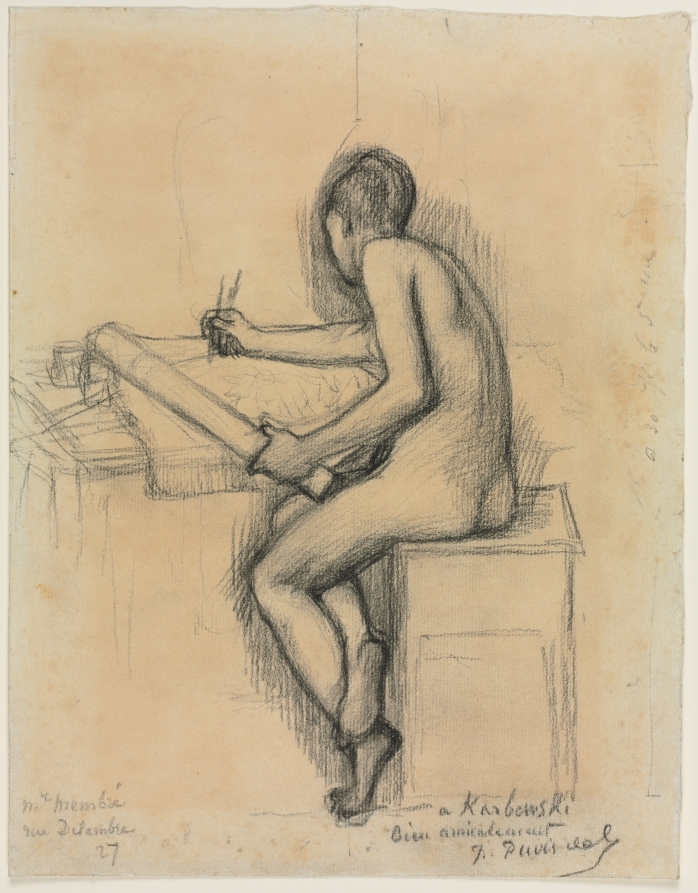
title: Study of a Seated Nude Female Model Drawing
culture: France, 19th century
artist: Pierre Puvis de Chavannes (French, 1824–1898)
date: c. 1888–1898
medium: black chalk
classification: Drawing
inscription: Inscribed lower right corner in black chalk: à Karbowski/Bien amicalement/ P. Puvis de C Inscribed lower left corner in black chalk: M[?] Membré / rue Delambre / 27 Inscription on right margin in graphite: [partially illegible] ... 30 fr [?] 65[?]...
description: In this surprising drawing, a nude figure abandons her role as model in favor of drawing. The passive nude has become active; she turns away from the viewer, absorbed in her own artistic pursuit.